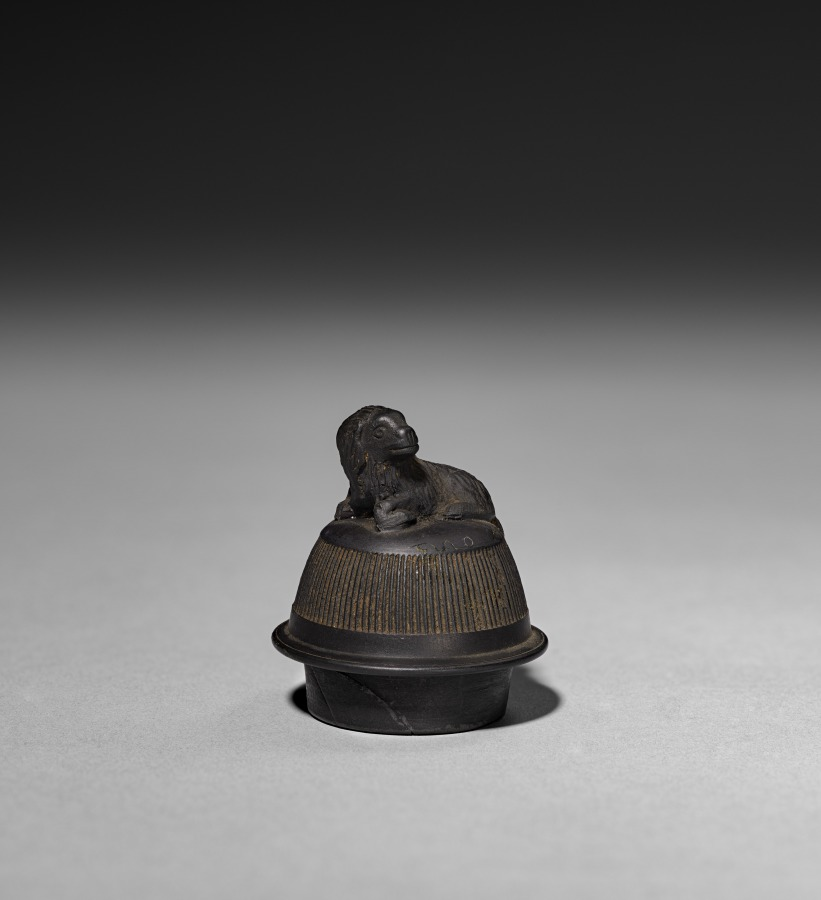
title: Cover for a Tea Caddy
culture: England, Staffordshire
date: c. 1770–80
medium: Black basalt stoneware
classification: Ceramic